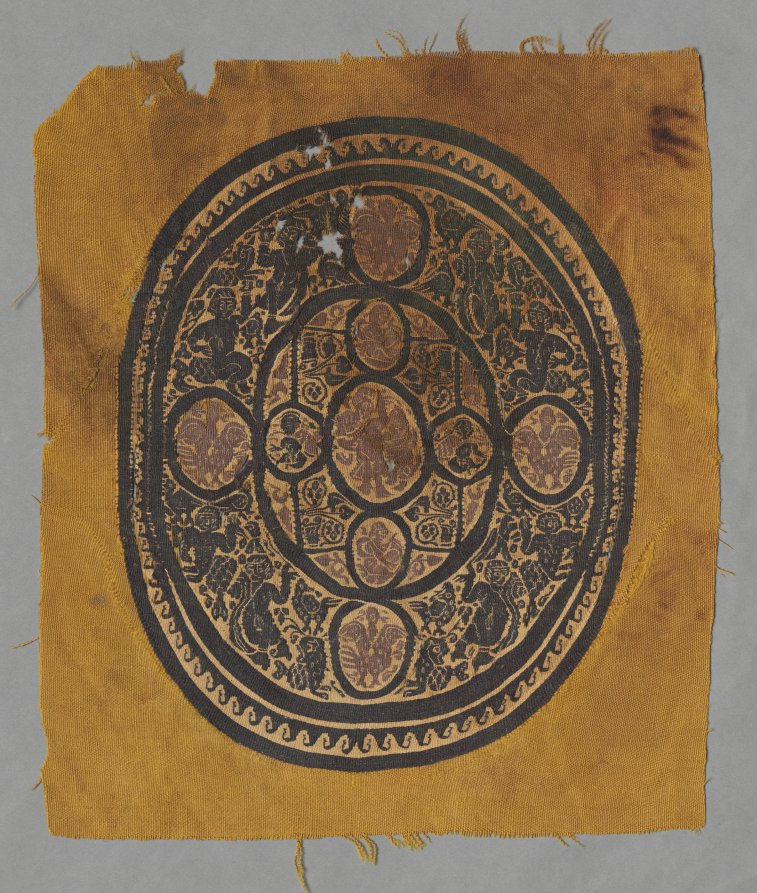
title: Tunic Fragment with Segmentum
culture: Africa, North Africa, Egypt, Coptic-style weaver(s)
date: c. 500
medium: Wool, linen, and dye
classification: Textile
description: Segmentum (medallions) like this decorated tunics in Coptic Egypt. Medallions were woven into a tunic’s shoulders or lower half. This medallion's design scheme displays waves encircling geometric shapes and representational images. Coptic can refer to a language, an ethnic group, a religion, or an artistic style (which wasn’t always Christian). Coptic classical imagery reflects the Hellenized (Greek, 305–30 BC) and Roman cultures of Egypt (30 BC–AD 395) before the Byzantine era.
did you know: Many different kinds of birds are woven into this medallion, hiding amongst the floral and scroll designs.